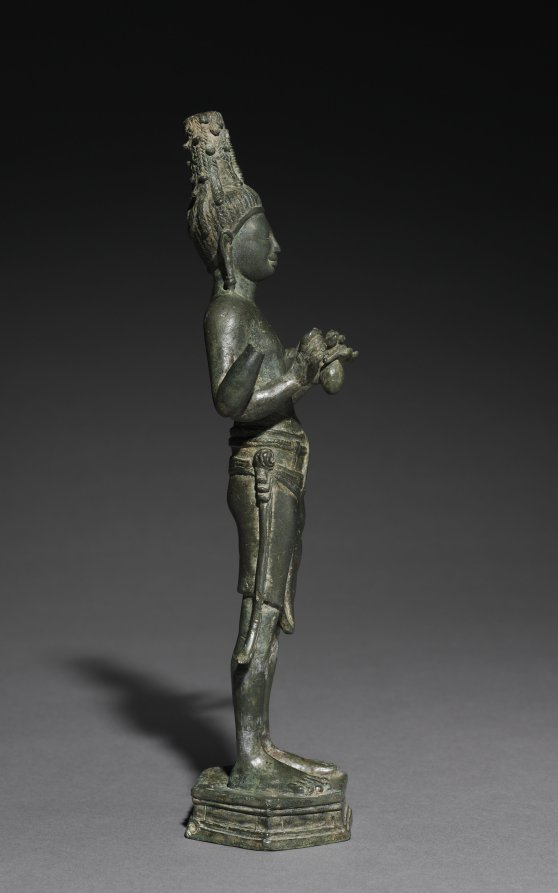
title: Maitreya: The Buddha of the Future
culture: Cambodia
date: 600s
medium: bronze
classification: Sculpture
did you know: The slender fingers of the left hand hold a water pot while the right hand is in the gesture of the vitarka mudra, a gesture of explanation and exposition.